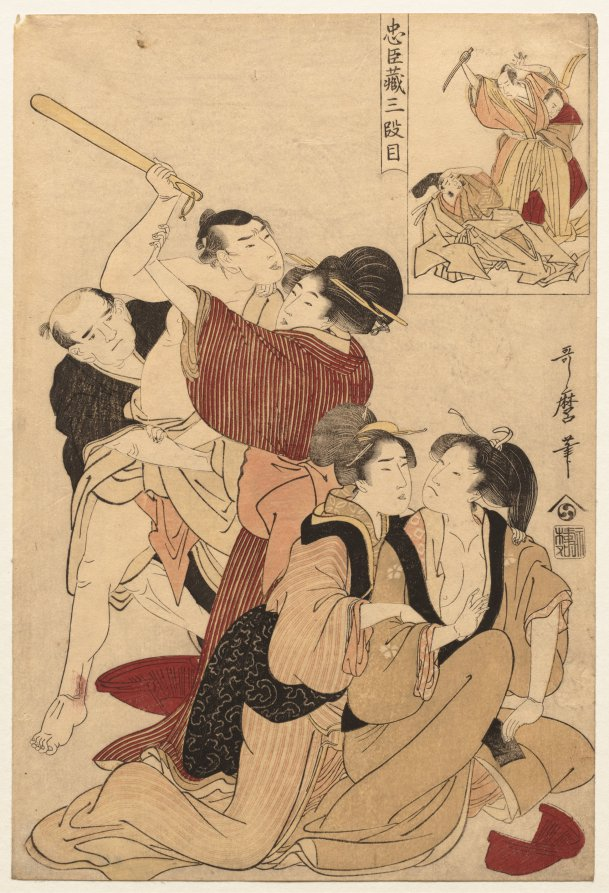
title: Chushingura: Act III of The Storehouse of Loyalty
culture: Japan, Edo period (1615–1868)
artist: Kitagawa Utamaro (Japanese, c. 1754–1806)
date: late 1790s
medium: color woodblock print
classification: Print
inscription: Signature: Utamaro hitsu Publisher: Nishimuraya Yohachi (Eiju han, emblem)